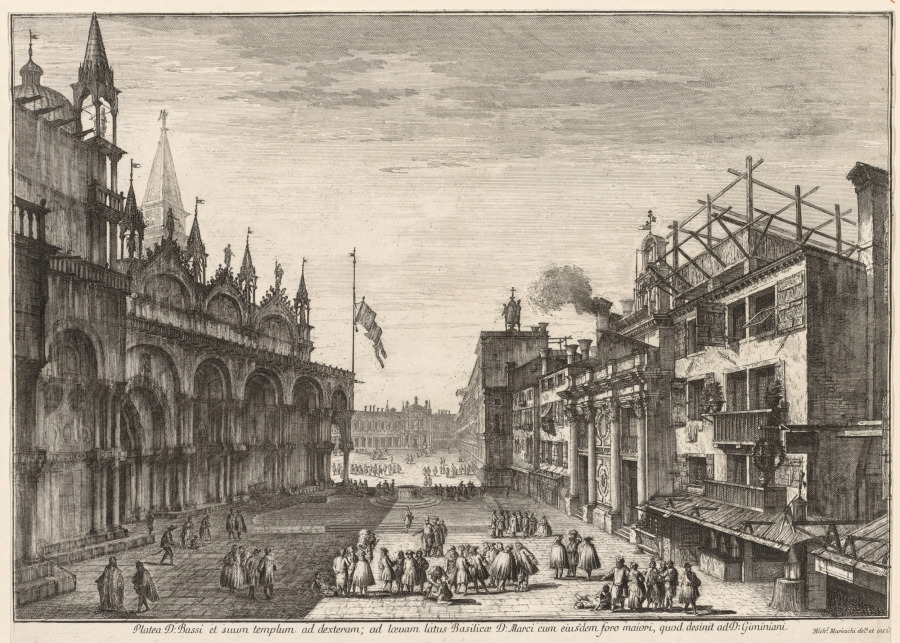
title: Views of Venice: Piazzetta S. Basso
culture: Italy, 18th century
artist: Michele Marieschi (Italian, 1710–1743)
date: 1741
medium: etching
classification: Print